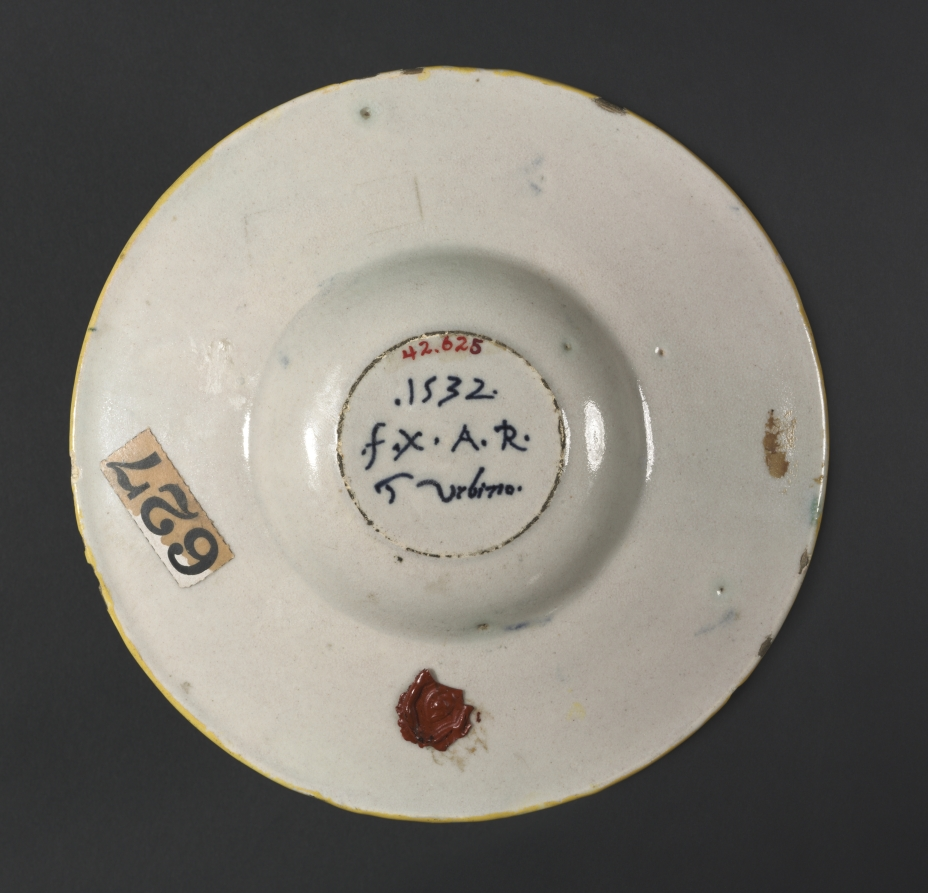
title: Plate with Arms of the Pucci Family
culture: Italy, Urbino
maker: Francesco Xanto Avelli (Italian, 1487?–1544?)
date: 1532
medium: tin-glazed earthenware (maiolica)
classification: Ceramic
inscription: signed: F(rancesco) X(anto) A(velli) (da) R(ovigo)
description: Italian nobles of the 1500s often expressed their wealth, social status, and sophistication by ordering large sets of maiolica that sometimes carried their coats of arms or even likenesses, usually in profile as in portraits of the period. The Pucci family was a powerful noble household in Renaissance Florence who were at times quite close allies of the Medici, a prominent banking family.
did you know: A more contemporary head of the family, Emilio Pucci, became famous as a fashion designer in the 1960s and 1970s.